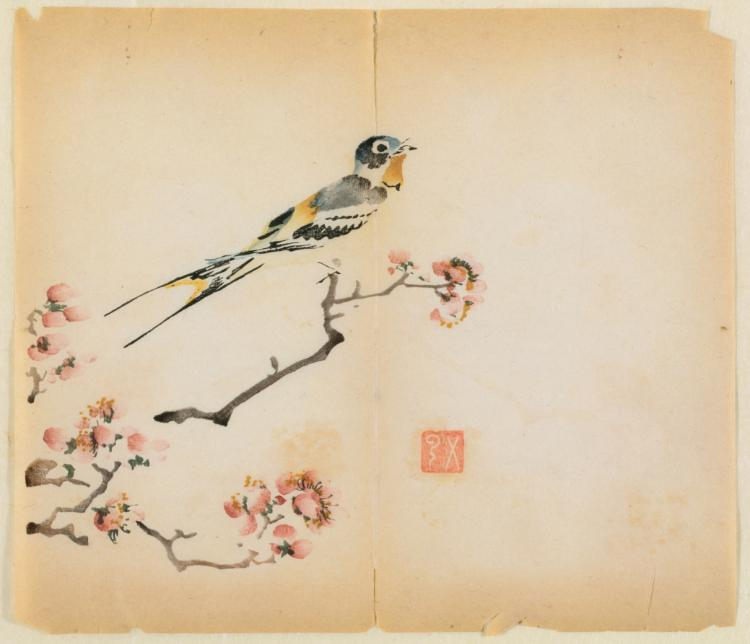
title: Swallow on Flowering Peach Branch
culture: China, Ming dynasty (1368-1644) or later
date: 1368–1644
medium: color woodblock print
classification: Print